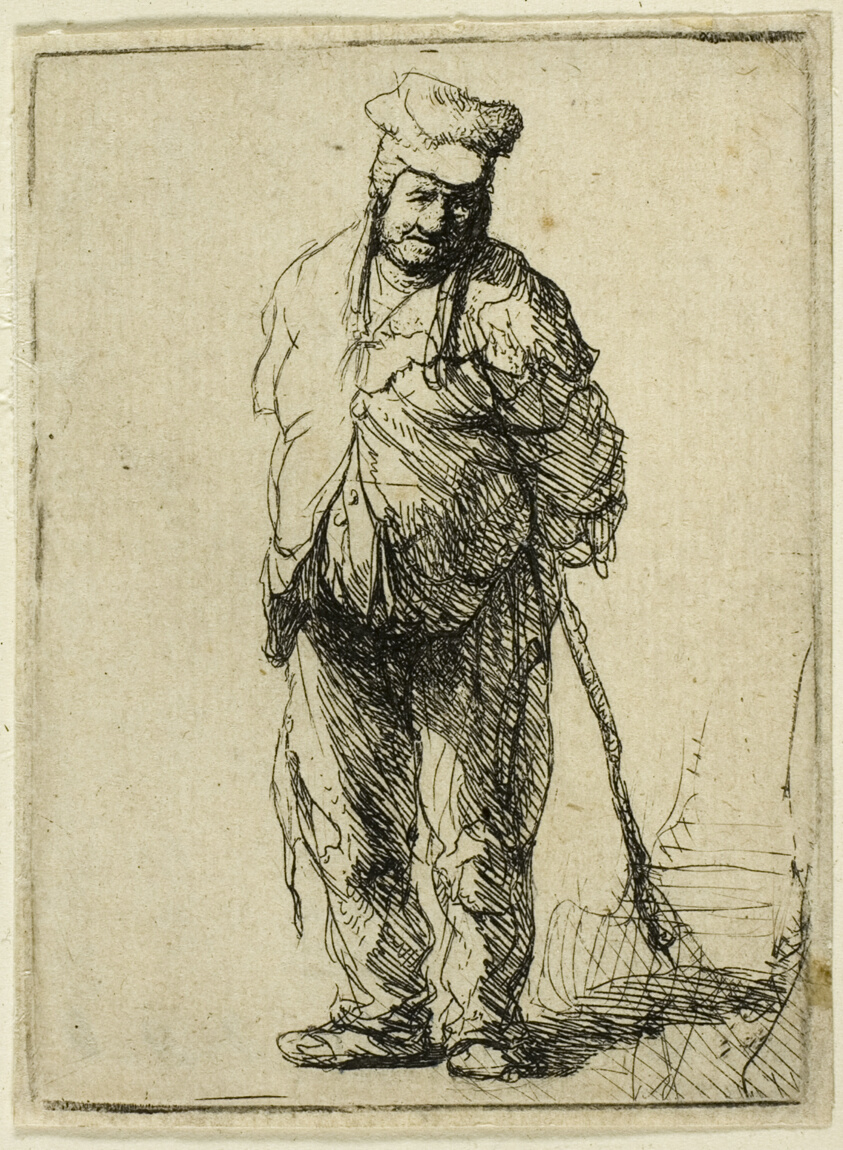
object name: Print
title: Ragged Peasant with His Hands behind Him, Holding a Stick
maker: Rembrandt van Rijn (Dutch, 1606-1669)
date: c. 1630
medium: Etching on ivory laid paper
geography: Holland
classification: etching; print; prints and drawing; paper